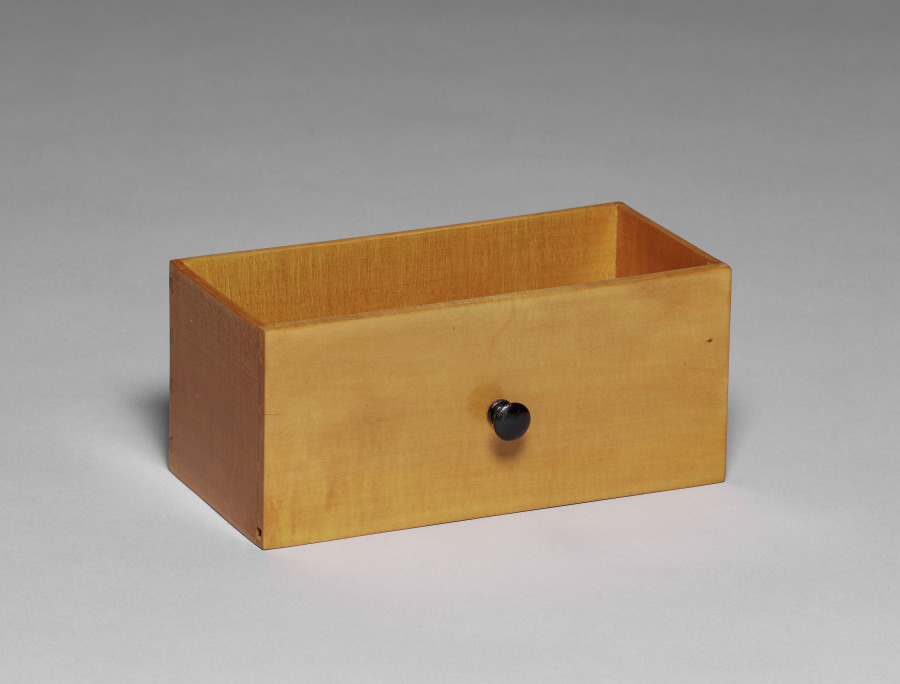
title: Drawer for a Globe Work Table (Globustisch)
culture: Austria, Vienna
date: c. 1810–15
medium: Burl walnut veneer, mahogany, ebony, satinwood, gilt wood, painted wood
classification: Furniture and woodwork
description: Work tables resembling globes were the usual form for a lady's sewing or writing table around 1800 in Austria. Combining moving parts, secret compartments, and highly finished decoration, these tables were also a way for the cabinetmaker to show off his skill. The tripod supports and temple-like architectural quality of both the exterior and interior decoration reflect the fashionable taste for neoclassical style, or Biedermeier as it was called in Austria, where Vienna was the center of such elaborate furniture production.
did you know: The top half of the globe rotates upward to reveal hidden compartments for sewing tools, threads, and unfinished fabric pieces.